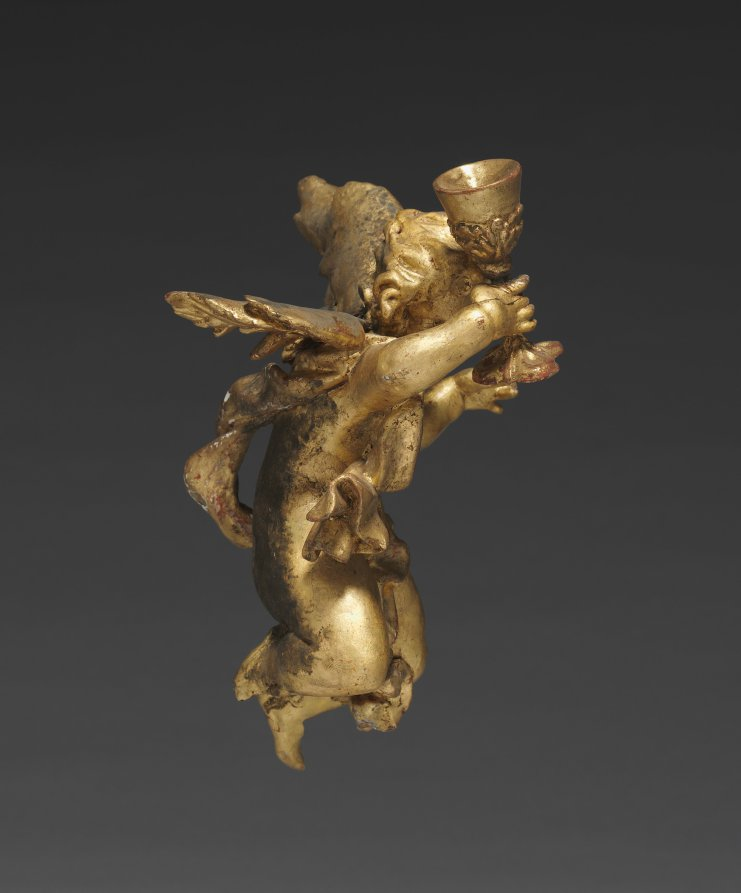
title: Altarpiece with Relics - Putto, middle right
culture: Germany, Bavaria, 18th century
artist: Joseph Matthias Götz (German, 1696–1760)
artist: and Workshop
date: c. 1735–40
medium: gilded wood, with relics in niches: gilded wood, mother-of-pearl, ebony, red silk, gold wire, seed pearls, rock crystal, pen and ink on paper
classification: Sculpture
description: Götz covers every surface in gold leaf, giving each part of the object equal importance, rather than simply framing a central picture. In this distinctively Central European approach, figural narrative is subordinate to the overall ensemble. Götz designed this object to rest on top of an altar, probably in front of a larger painted or sculpted decorative scheme. The work contains relics seen through the small windows on the perimeter. These small remains of holy figures demonstrate the persistence of a medieval Catholic tradition well into the 1700s.